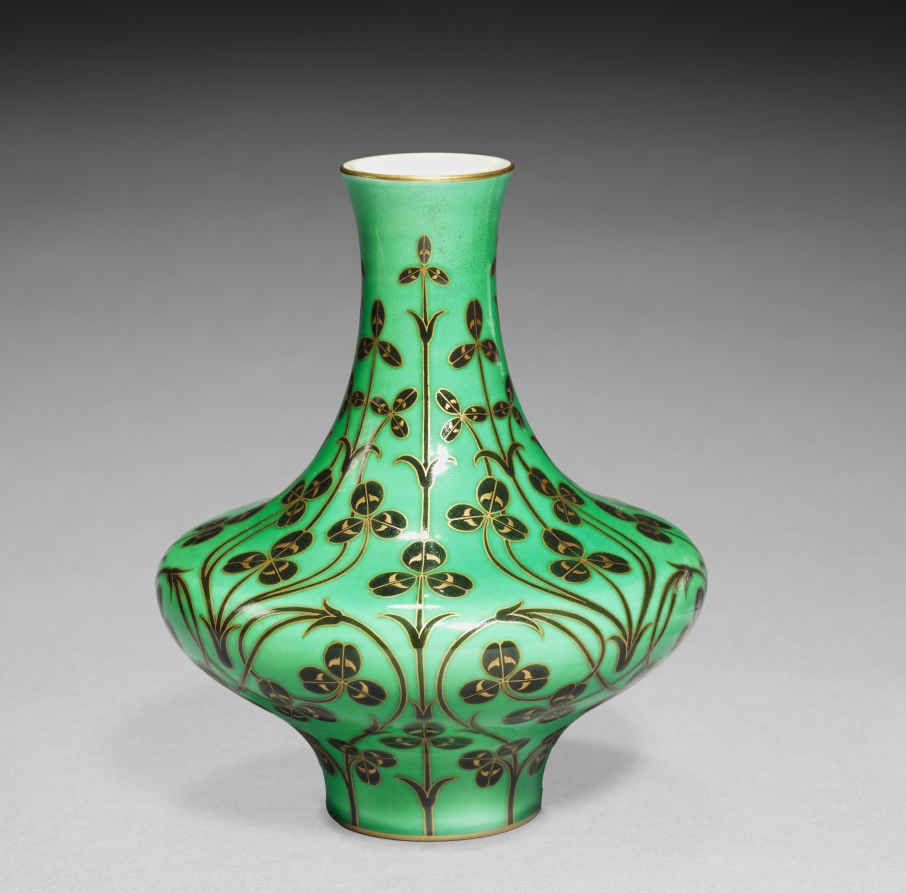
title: Vase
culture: France, Sèvres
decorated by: Henri-Louis-Laurent Ulrich (French)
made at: Sèvres Porcelain Factory (French, est. 1756)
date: 1897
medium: porcelain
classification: Ceramic